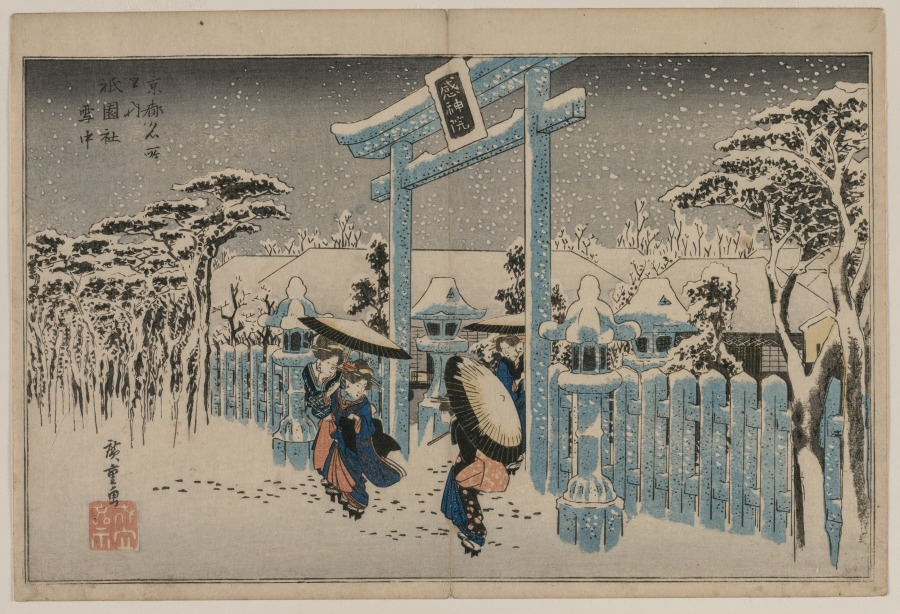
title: Snow at the Gion Shrine, from the series Famous Places in Kyoto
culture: Japan, Edo period (1615–1868)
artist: Utagawa Hiroshige (Japanese, 1797–1858)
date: mid-1830s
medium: color woodblock print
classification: Print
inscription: Signature: Hiroshige ga. Artist Seal: Ichiryusai.